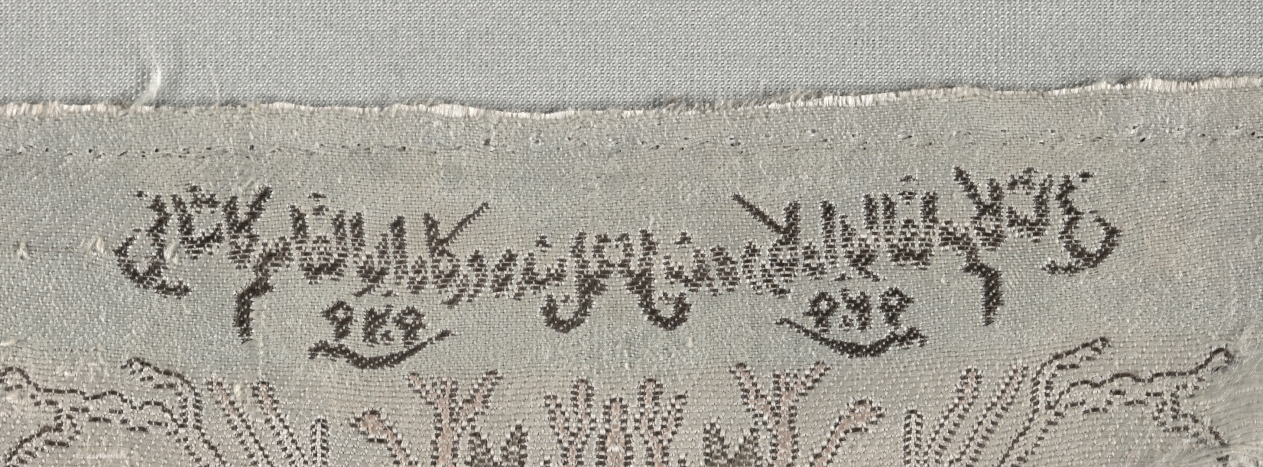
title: Silk Textile with Goatherds in a Landscape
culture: Iran, Isfahan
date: 1900s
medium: Silk: lampas weave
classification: Textile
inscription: inscription at top: "Work of the servant of the court, Abu al-Quasim Kashani, year 929."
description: This textile has a repeated design of goatherds piping to goats in a landscape setting. At the top is an inscription reading: “Work of the servant of the court, Abū al-Quāsim Kāshānī, year 929.” In the Muslim calendar 929 is equivalent to 1523, but this fabric was woven in the 1900s. This textile emulates examples from the Safavid period (1501–1722), regarded as a high point of Iranian culture. A lampas weave is characterized by the combination of two weave structures with two sets of wefts—the threads over and under which the warp threads are woven. Threads of the pattern weft are laid on top of the background weft to form the design. Lampas is typically woven in silk, sometimes with the addition of metallic thread.